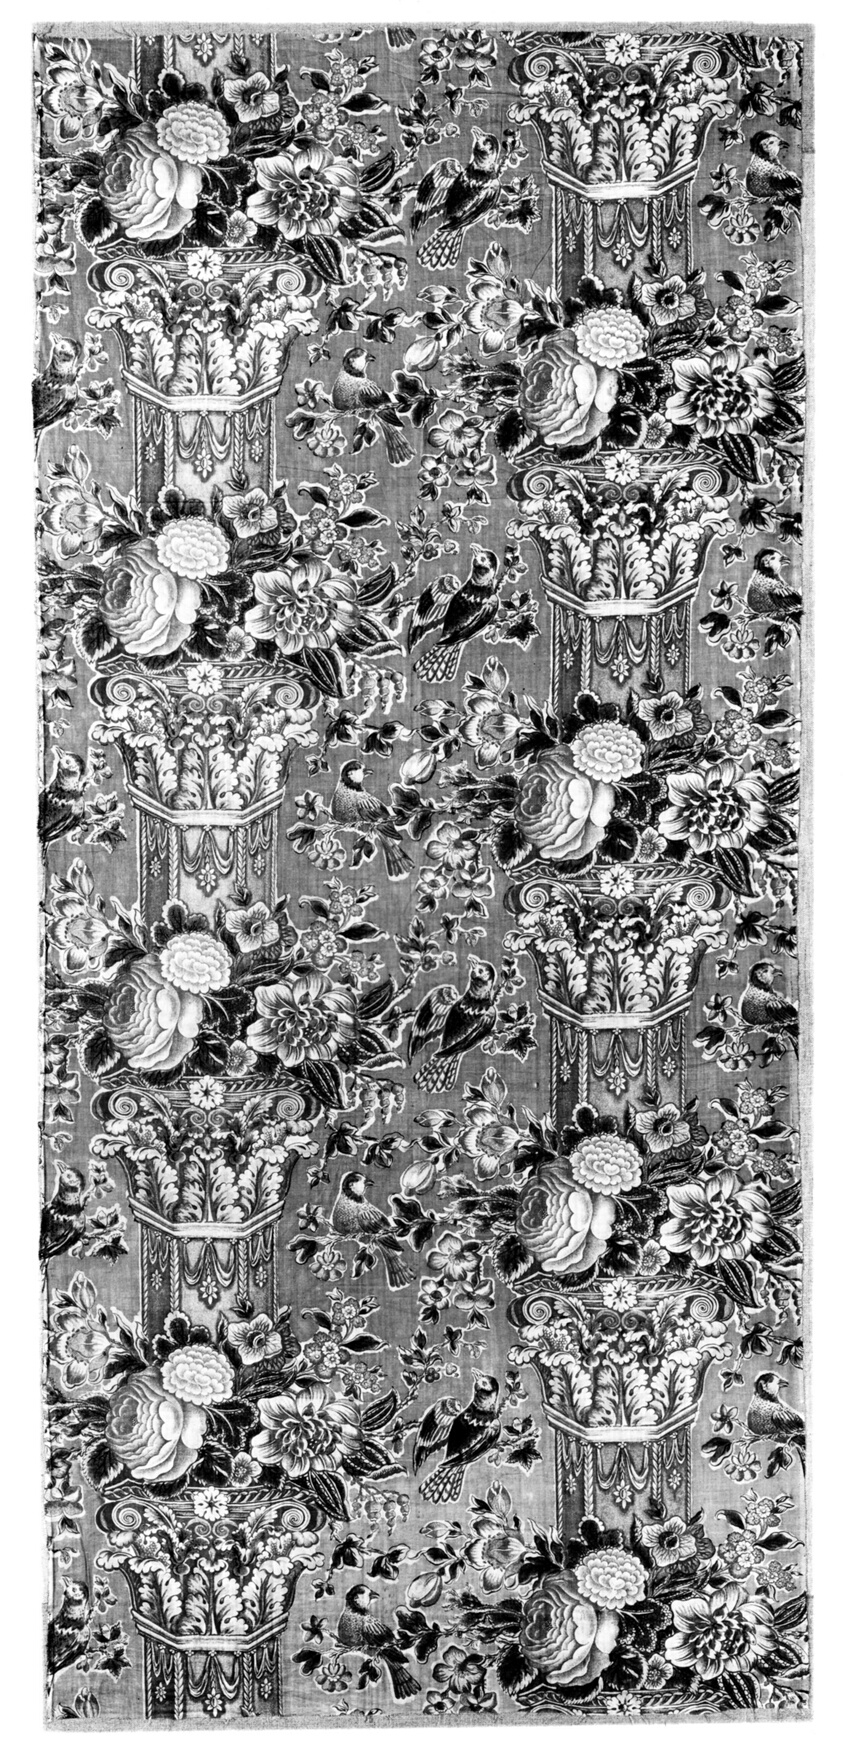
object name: Textile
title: Panel (Pillar Print)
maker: Manufactured by Stead McAlpin & Co., founded in 1835; England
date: 18th century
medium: Cotton, plain weave; roller and block printed; painted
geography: England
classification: textile; weaving; weaving - printed